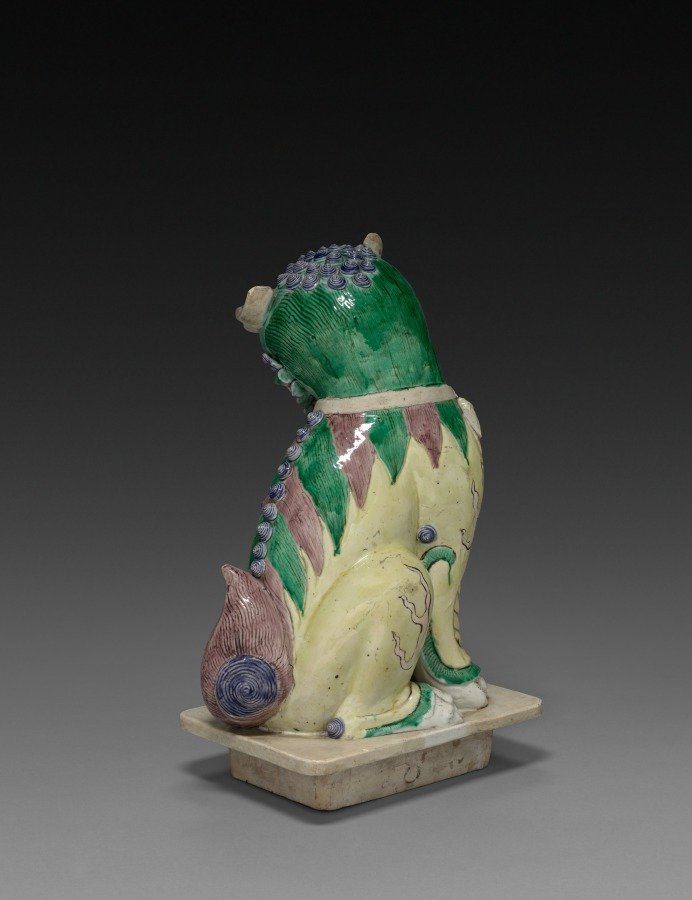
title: Lion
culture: China, Qing dynasty (1644-1911), Kangxi reign (1661-1722)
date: 1662–1722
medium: porcelain with overglaze enamel decoration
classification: Sculpture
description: This porcelain lion is a pair with 1930.643. The female is with a cub, while the male lion holds a ball. Guardian lions were traditionally placed in front of buildings to protect from harmful spiritual or human forces.